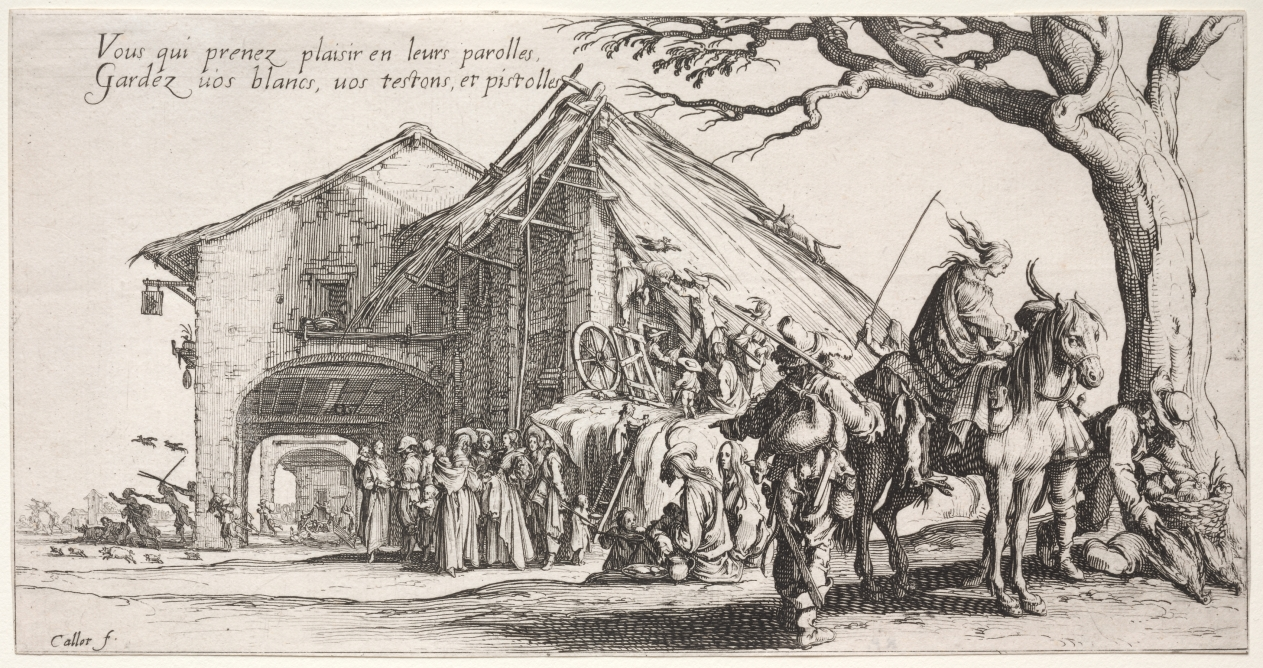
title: The Stopping Place: The Fortune Teller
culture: France, 17th century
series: The Bohemians:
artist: Jacques Callot (French, 1592–1635)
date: c. 1621–25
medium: etching and engraving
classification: Print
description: Jacques Callot, a masterful draftsman, spent the greater part of his life at the ducal courts of Tuscany and Lorraine, where he produced prints to record festivals and theatrical performances. He also executed religious subjects and scenes reflecting many aspects of daily life including war, pervasive in 17th-century Europe. When returning to France from Italy, Callot probably saw bands of rootless men, women, and children-a common sight-which became the subject of The Bohemians. He conceived of these four prints as a long frieze; the lines in each of the sheets extend into the sheet that follows. The first two scenes depict a procession of scrawny horses and disheveled families in tattered, exotic clothing. The last two show these vagrants pillaging a farm and then enjoying a feast. The inscriptions, from left to right, comment on the action: The only things these poor fortune-telling beggars carry with them are things yet to come. Are these not fine messengers, straying through foreign lands? You who take pleasure in their words, watch out for your blancs, testons and pitolles (coins). When all is said and done, they find that their fate is to have come from Egypt to this feast.